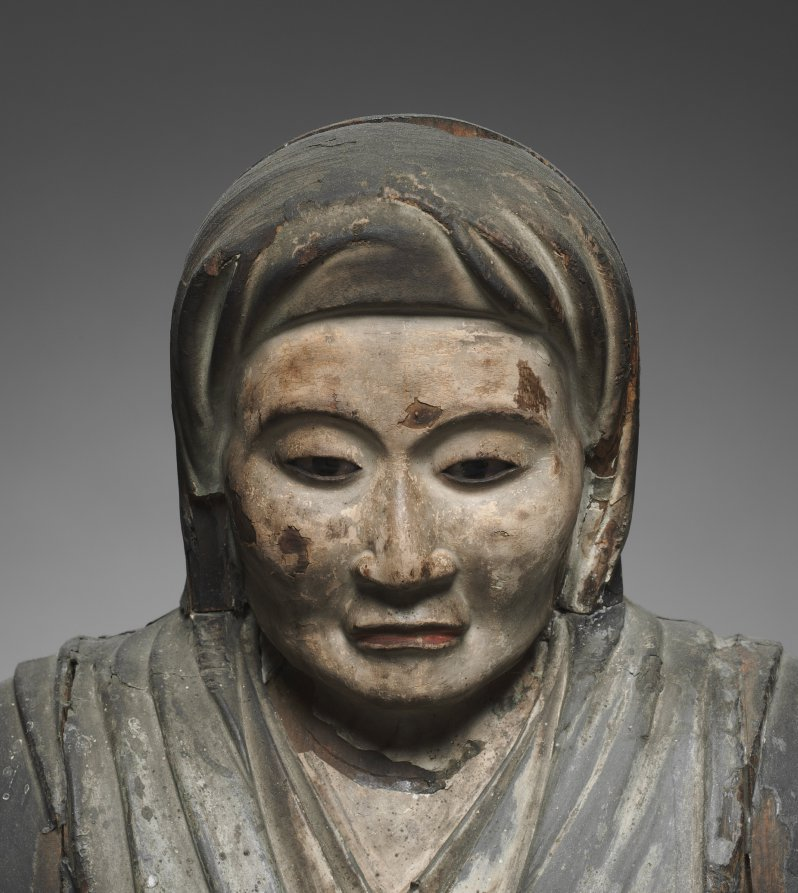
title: Portrait of the Mother of Hotto Kokushi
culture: Japan, Edo period (1615–1868)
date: 1680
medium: wood with polychromy and inlaid crystal and stone eyes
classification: Sculpture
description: This is an imaginary portrait of the mother of the Zen master Hottō Enmyō Kokushi (1203–1298), whose sculptural portrait (1970.67) can be seen in gallery 235B. That image was carved soon after the master's death. His mother's image, however, was completed several hundred years later, so the likeness is doubtful.